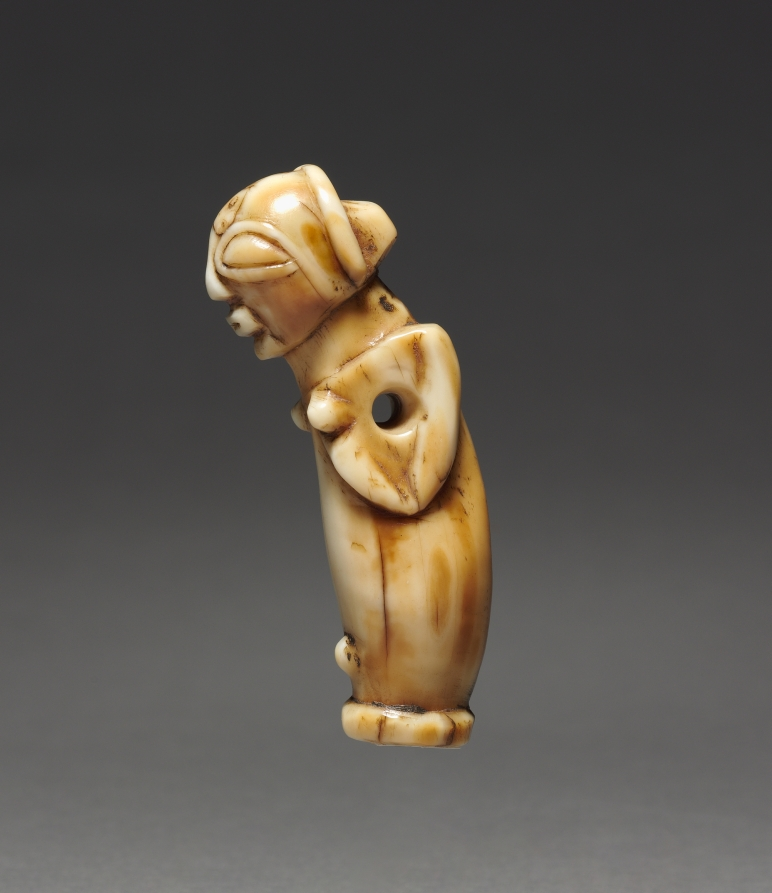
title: Pendant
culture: Africa, Central Africa, Democratic Republic of Congo, Luba-style maker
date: late 1800s–early 1900s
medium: Ivory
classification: Jewelry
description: Luba pendants made in ivory or bone were originally suspended on a cord and worn diagonally across the chest of a high-ranking member of society. Often accompanied by amulets, beads, or small antelope horns, they represented ancestral spirits and served as portals to ancestral wisdom and beneficence. Many of these diminutive figurines hold their hands to their breasts as a sign of the secrets and wisdom they contain.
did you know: The caramel-colored patina of the ivory indicates the frequent usage of the pendant.